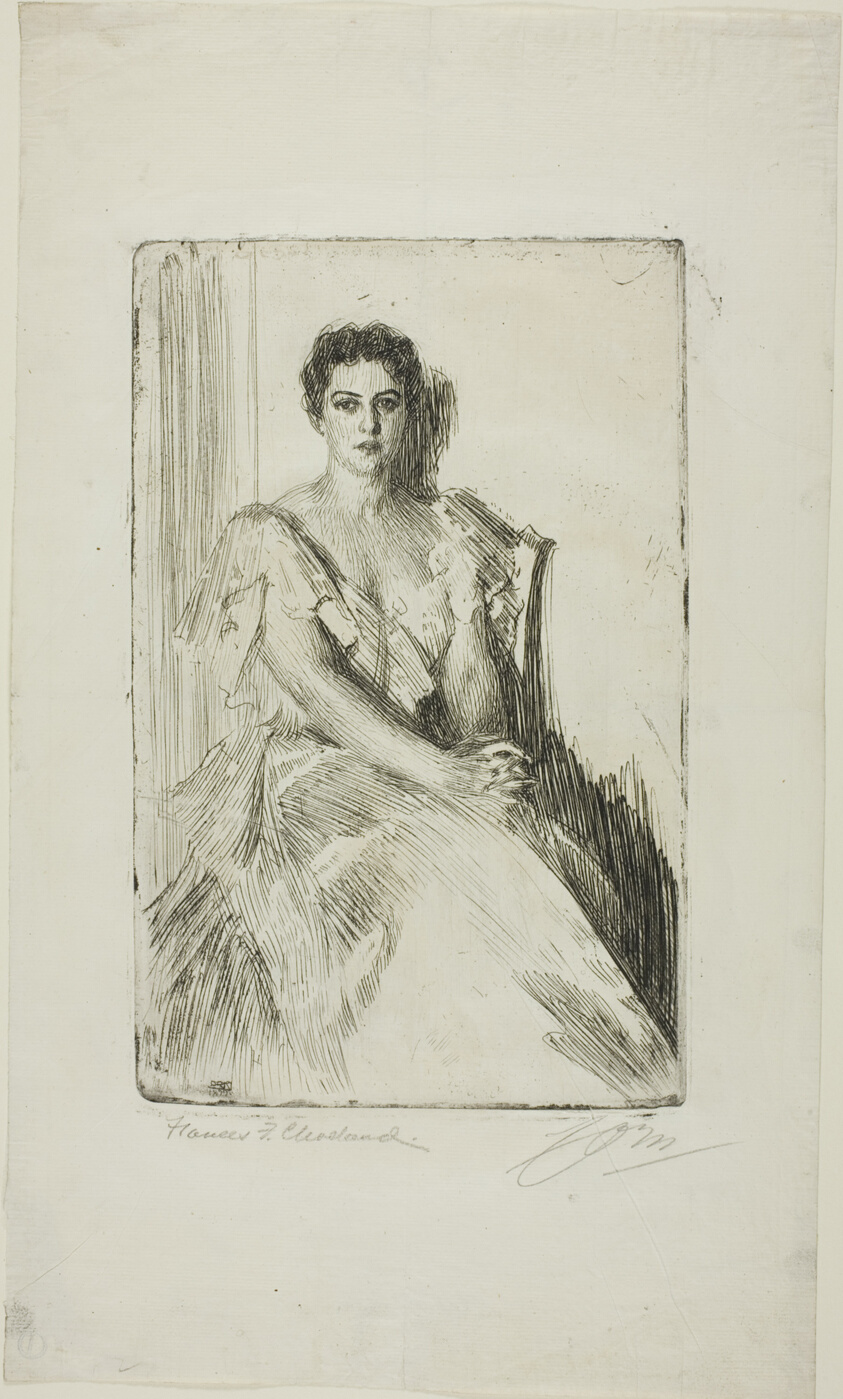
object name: Print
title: Mrs. Cleveland II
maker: Anders Zorn (Swedish, 1860-1920)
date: 1899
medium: Etching on ivory laid paper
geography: Sweden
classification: etching; print; prints and drawing